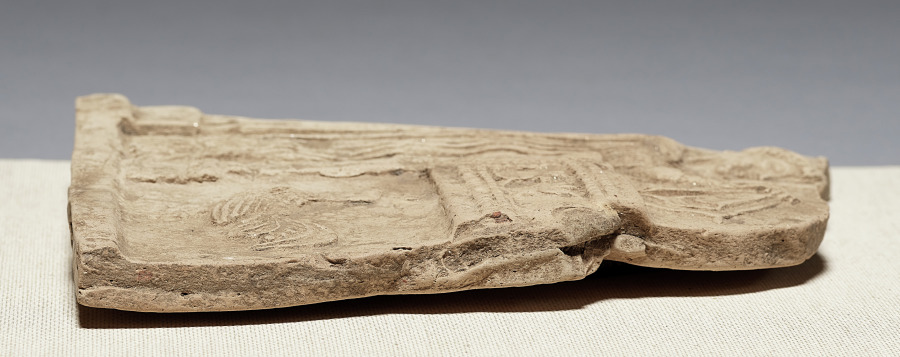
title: Votive Plaque (Pinax) with Persephone Making her Bridal Bed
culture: West Greek/South Italian, Classical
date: c. 490–450 BCE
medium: Terracotta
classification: Plaque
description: Probably once brightly painted, this relief plaque belongs to a series of votive dedications made in Locri Epizephirii, near the “toe” of Italy, to the goddess Persephone (or Kore), daughter of Demeter. Following her abduction by Hades, god of the Underworld, Persephone regularly returned to earth, dictating the seasons and making agriculture possible. Often, as here, the plaques show domestic scenes.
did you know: The rooster often appears with Persephone on such plaques, perhaps because both mark transitions.